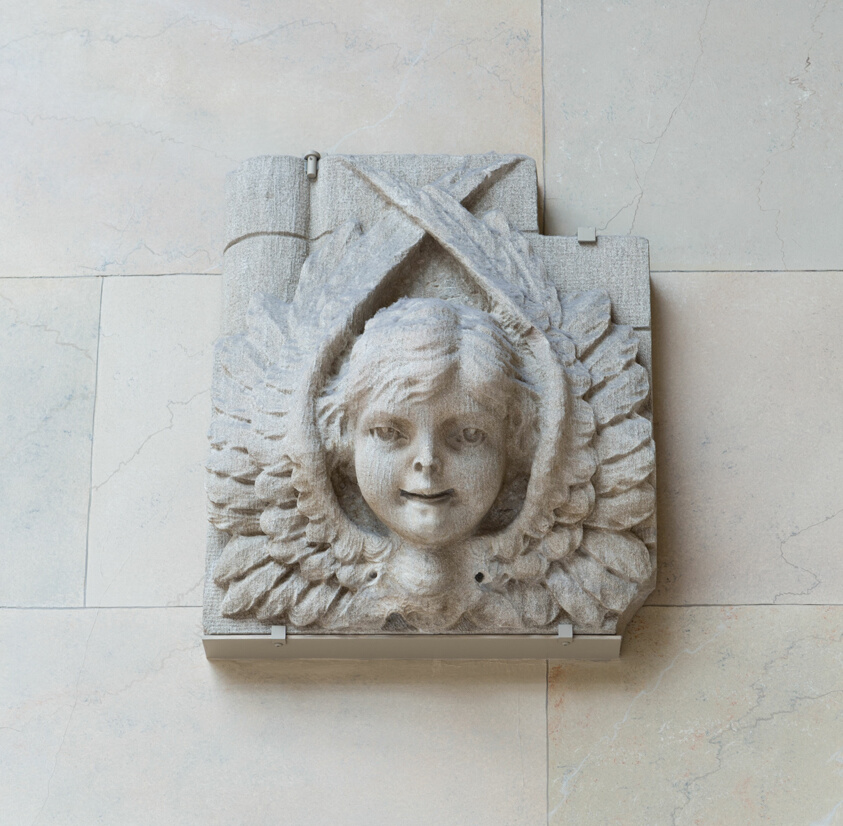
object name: Architectural fragment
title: Victor Falkenau House, Chicago, Illinois, Stringcourse Element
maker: Adler & Sullivan; American, 1883–1895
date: 1888–89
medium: Terra-cotta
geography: United States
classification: architectural fragment